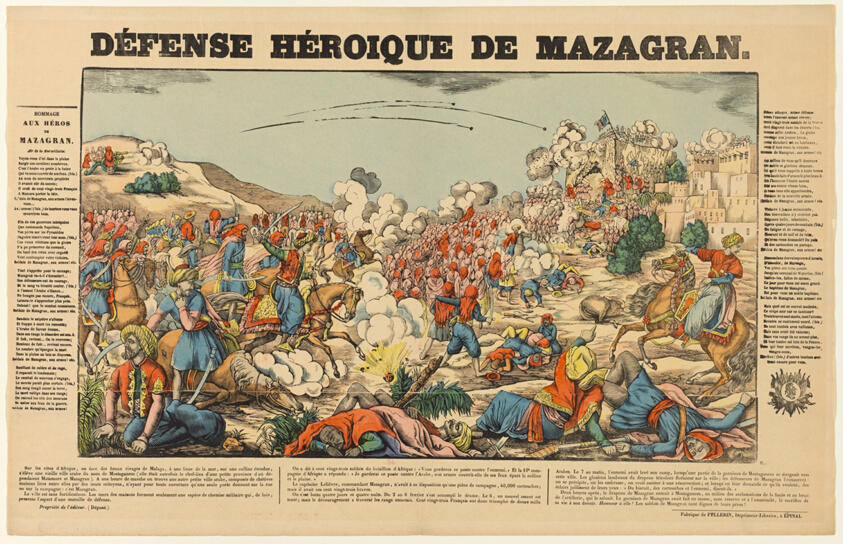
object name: Print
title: Heroic Defense of Mazagran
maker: Unknown artist; Printed by Jean-Charles Pellerin (French, 1756-1836)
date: late 18th or early 19th century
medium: Woodcut with hand-coloring on cream wove paper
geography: France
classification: woodcut; print; prints and drawing